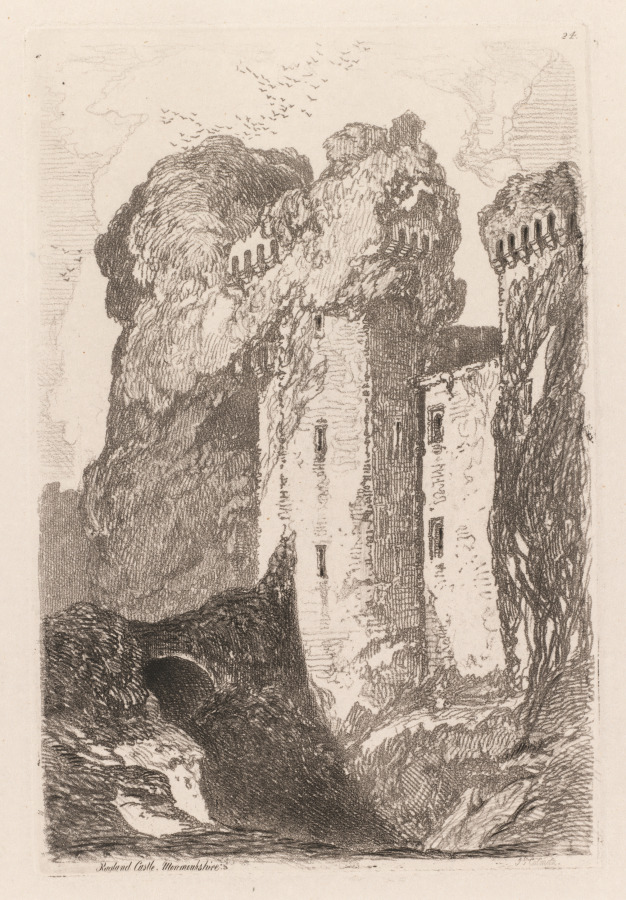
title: Liber Studiorium: Ragland Castle, Monmouhshire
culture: England, 19th century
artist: John Sell Cotman (British, 1782–1842)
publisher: H. G. Bohn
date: 1838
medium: softground etching and roulette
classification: Print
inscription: signed lower right in plate, J.S.Cotman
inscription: lower left of plate: Ragland Castle, Monmouhshire